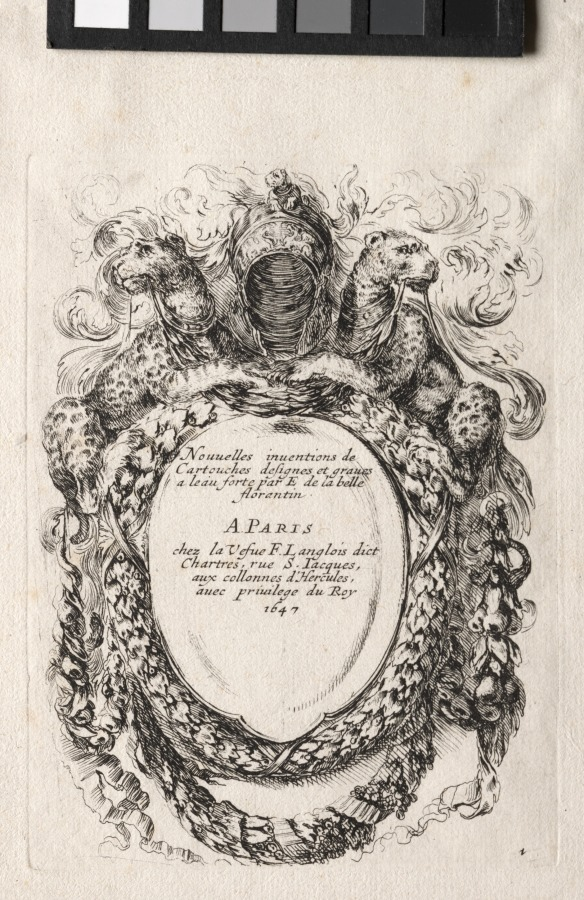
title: New Model for a Cartouche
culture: Italy, 17th century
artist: Stefano Della Bella (Italian, 1610–1664)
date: 1647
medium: etching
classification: Print